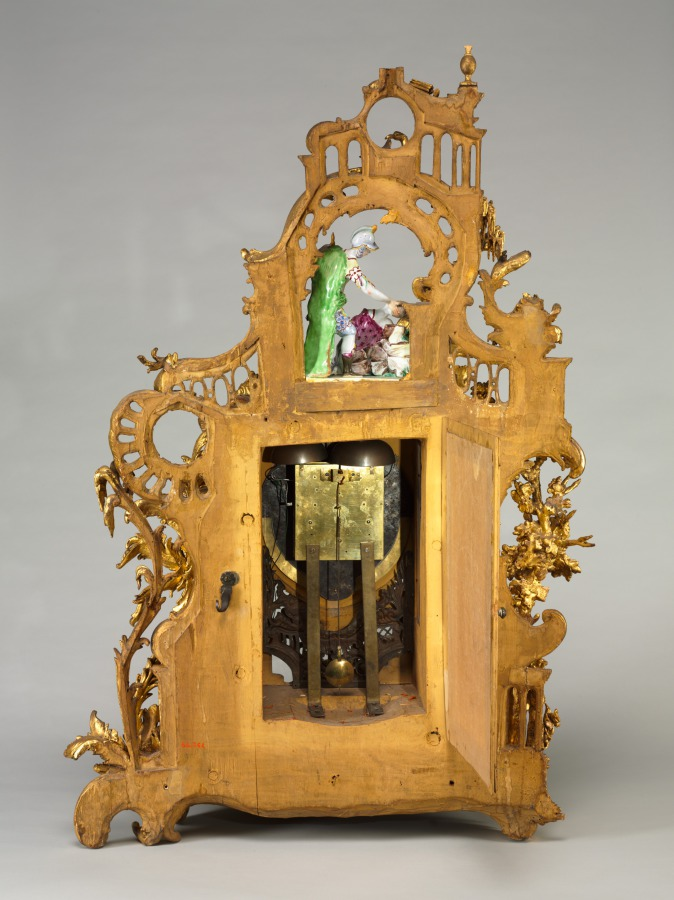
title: Clock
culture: Germany, 18th century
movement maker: Baumgartinger (German)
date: c. 1750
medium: carved and gilded wood, faience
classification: Furniture and woodwork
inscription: inscribed on face: Baumgartnger [sic] Mergentheim.